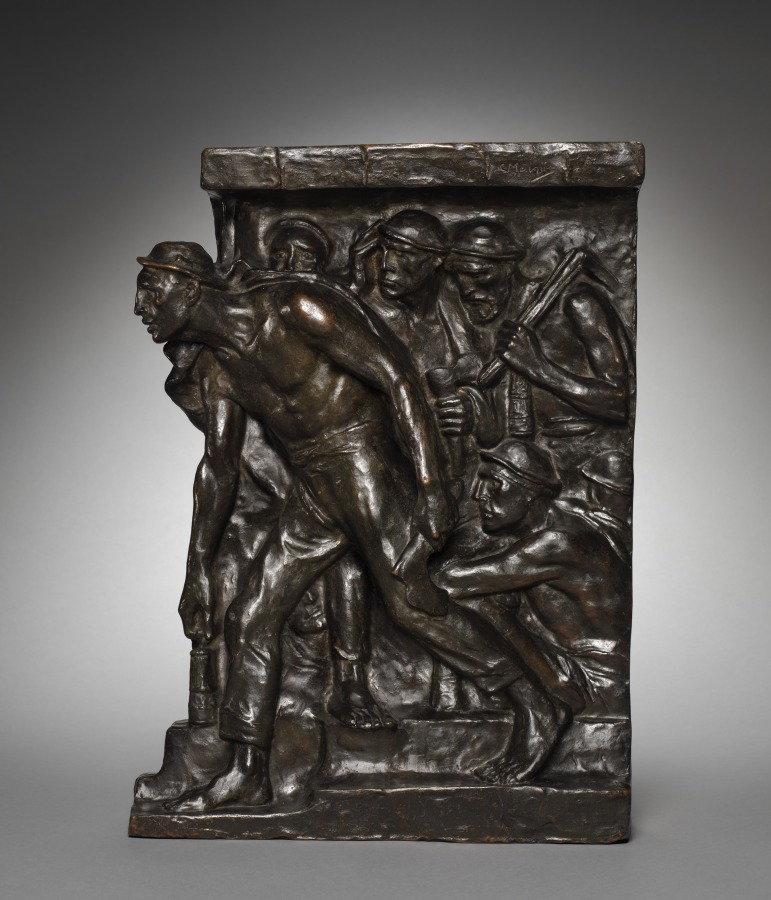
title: The Miners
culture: Belgium, 19th century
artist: Constantin Meunier (Belgian, 1831–1905)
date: c. 1890 – 1900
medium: bronze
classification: Sculpture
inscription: Signed on top: "C. Meunier"; inscribed on right side: "Atelier C. Meunier, 50 Rue (?)"